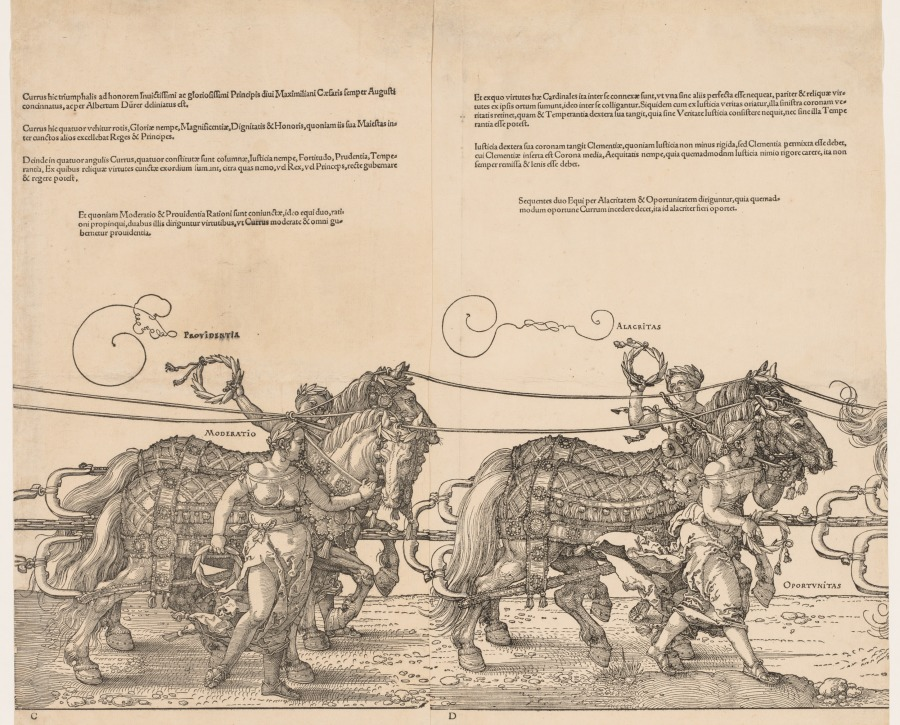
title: The Great Triumphal Car of Emperor Maximilian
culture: Germany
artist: Albrecht Dürer (German, 1471–1528)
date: 1523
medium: woodcut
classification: Print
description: Dürer conceived this fantastical chariot as part of a larger commission to depict Holy Roman Emperor Maximilian I (reigned 1486–1519) in a triumphal procession. The ruler sits enthroned in the lavish car, as Victory holds a laurel wreath above his imperial crown. Her feathered wings list Maximilian’s military campaigns. Nearly every component of the allegorical pageant—from the entourage of female attendants to the laurel garlands—has a Latin label describing honorable qualities of an ideal prince. The car rolls on wheels of Magnificence, Honor, Dignity, and Glory. Its driver is Reason, who guides a team of 12 horses with reins of Nobility and Power. Virtues of Justice, Strength, Wisdom, and Temperance, stand on pedestals arranged around the emperor. Maximilian died in 1519, before the ambitious commission could be completed. Dürer published The Great Triumphal Car at his own expense with text composed by his friend Willibald Pirckheimer (1470–1530).